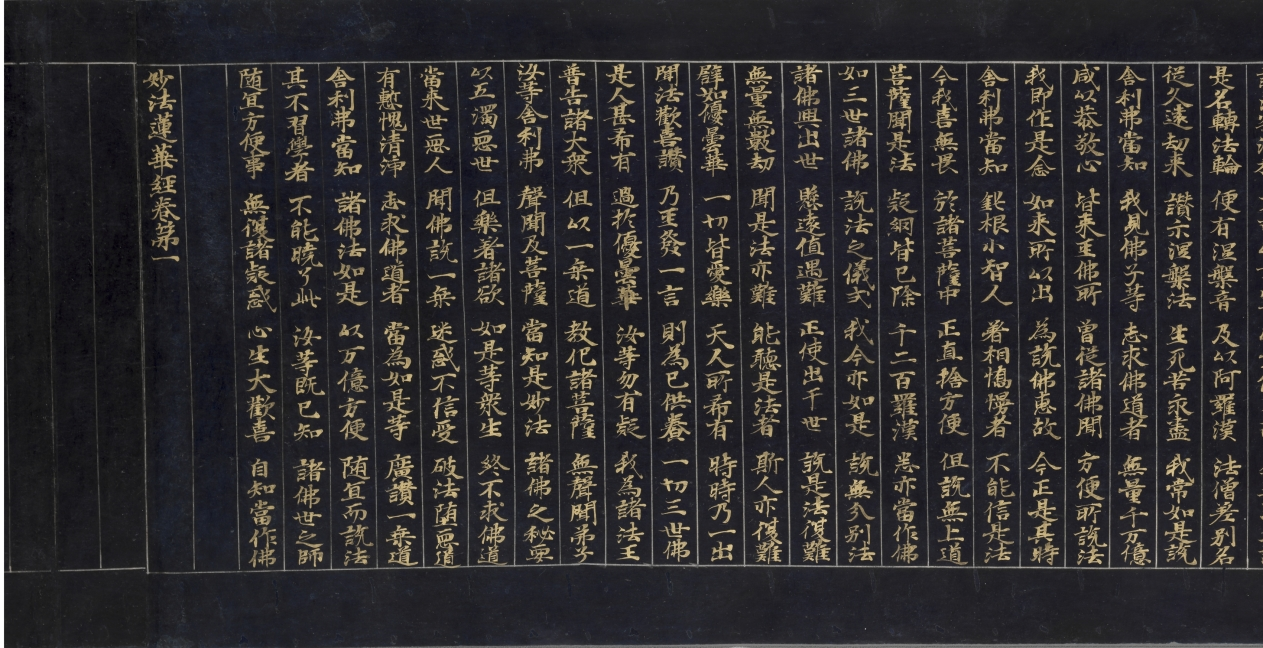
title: Lotus Sutra with a Frontispiece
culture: China, Song dynasty (960–1279)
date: late 1100s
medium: handscroll; gold ink on indigo sutra paper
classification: Painting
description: The frontispiece of this sutra, a sacred Buddhist scripture, illustrates episodes mentioned in the Buddha’s teaching. The sutra begins with a description of the historic Buddha Shakyamuni’s assembly on Vulture Peak. On the right, the Buddha sits amid members of his congregation: lohans (or arhats), bodhisattvas, gods, and other beings. The narrative proceeds from right to left. Heavenly light emanates from Shakyamuni’s brow to “illuminate the eighteen thousand worlds to the east.” Illustrated immediately below the ray is the sutra’s promise that if anyone carves or paints images of the Buddha “they will achieve the Buddha path.” The female figures in the frontispiece point to another promise made in this popular Mahayana school sutra, namely that female devotees and nuns who read the sutra are promised Buddhahood and salvation.